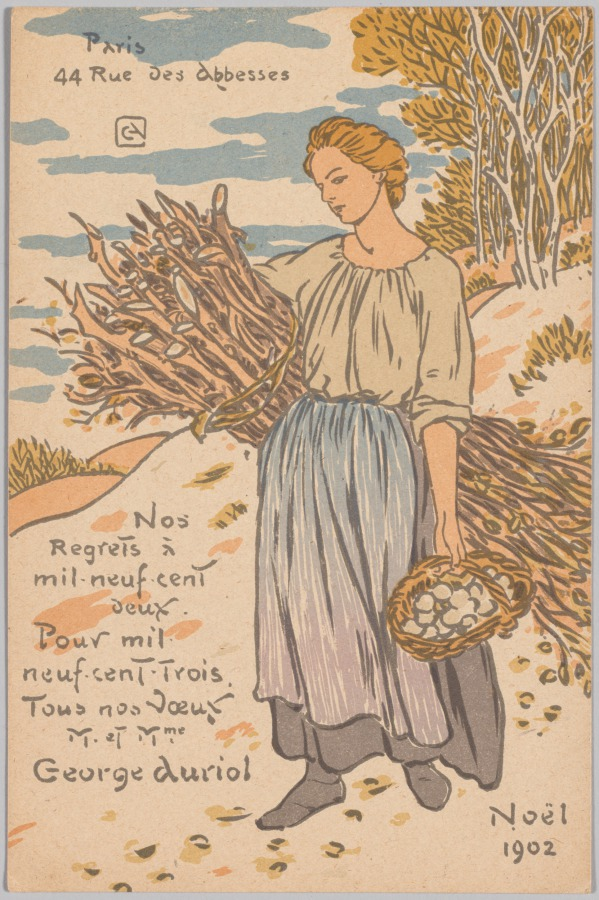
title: Noel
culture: France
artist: George Auriol (French, 1863–1938)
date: 1902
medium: Image and sheet: 17.8 x 11.7 cm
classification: Print